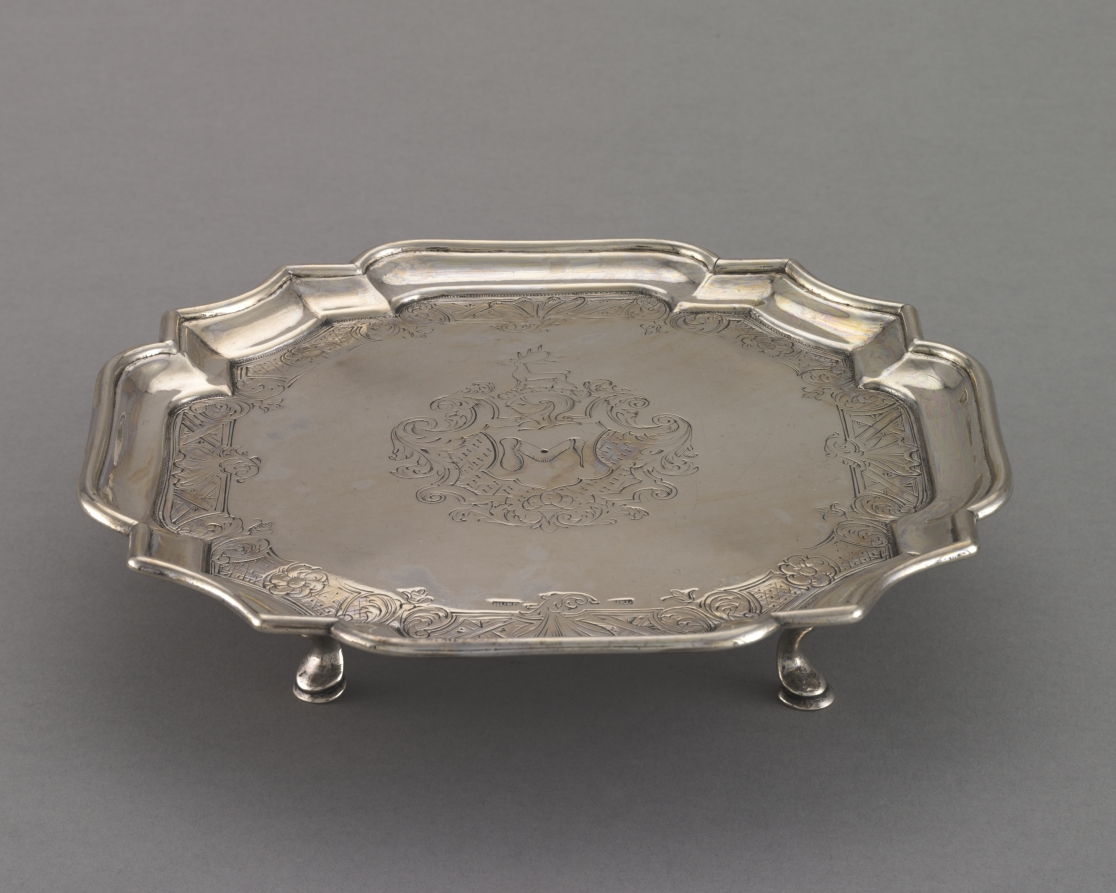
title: Salver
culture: America, Massachusetts, Boston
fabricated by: Jacob Hurd (American, 1702–1758)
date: 1740–50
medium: silver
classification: Silver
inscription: engraved: H over A + T over 1750 in shaded block letters underneath each salver.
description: The coat of arms is that of the Hastings family, the original owners of these serving pieces.